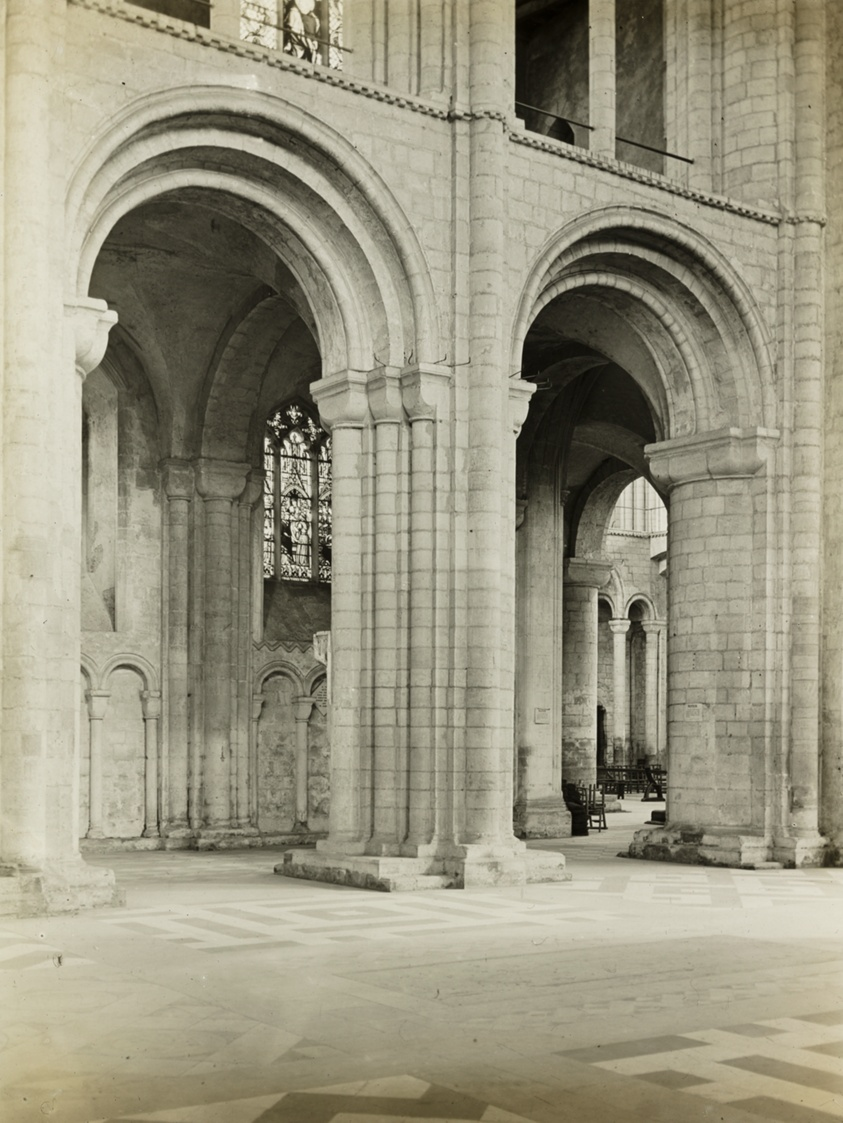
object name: Photograph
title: Ely Cathedral: Nave Arches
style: Pictorialism, 19th century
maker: Frederick H. Evans (English, 1853–1943)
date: 1891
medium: Lantern slide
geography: England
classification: photograph; photography